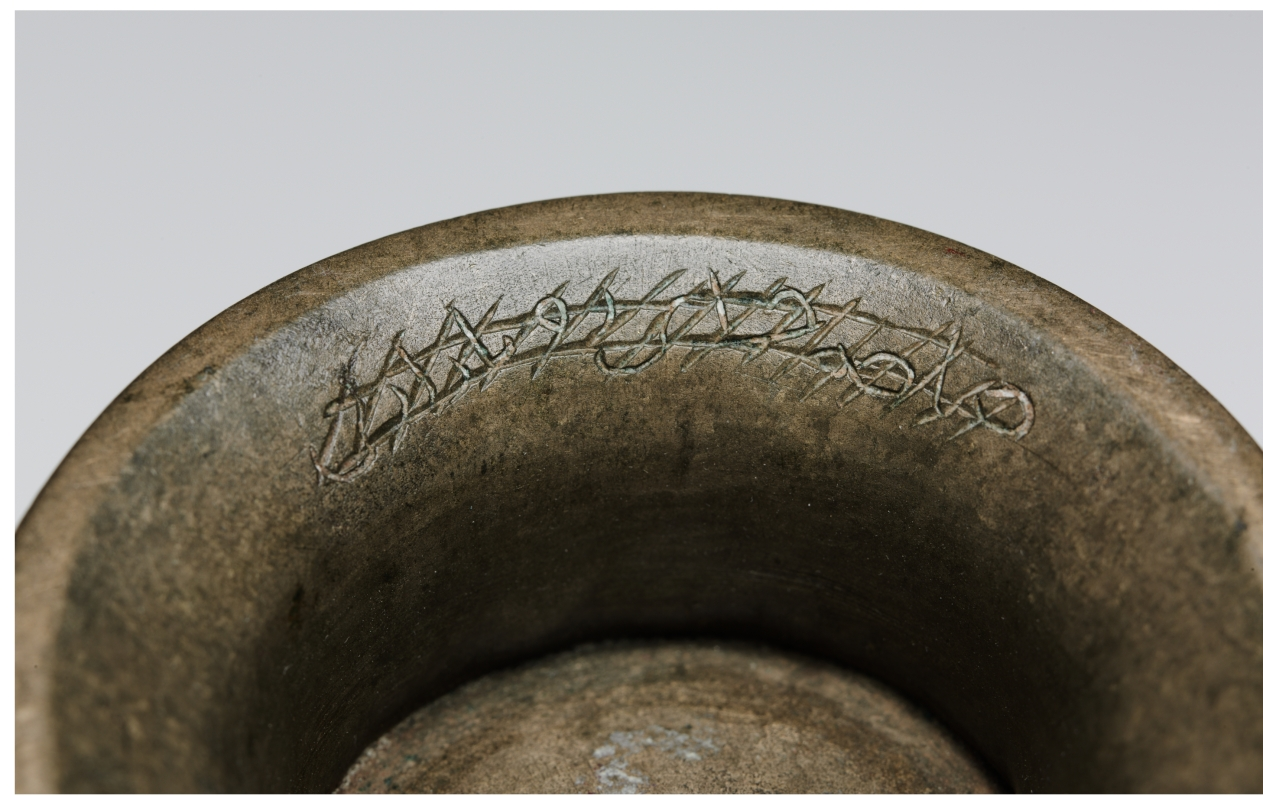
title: The Wade Cup with Animated Script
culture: Iran, Seljuq period of Iran (1037–1194)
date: 1200–1221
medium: brass inlaid with silver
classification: Metalwork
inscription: Glory, and success, and government, and bliss, and soundness, and peace of mind, and mercy, and well-being, and good health, and duration, and increase, and satisfaction, and care, and continuance to its owner.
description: The highlight of the cup’s decoration is the inscription around the rim, which you see on the walls around you, with letters composed of human figures, animals, and birds. This is known as animated script and it developed in northeast Iran or Afghanistan during the mid-1100s and migrated westward. The inscription on the rim of the Wade Cup is the pinnacle of this form of script with its full-figure animation. The body of the cup is covered with interlacing bands of compartments containing tiny figures of humans and animals. These represent the 12 signs of the zodiac from astrology, the practice of interpreting the influence of planets and stars on earthly affairs. Astrology began in Mesopotamia, was adopted by the Greeks, and then absorbed into medieval Islamic culture through translations of Greek texts.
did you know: This is known as the Wade Cup, after J. H. Wade who bequeathed the funds for its acquisition